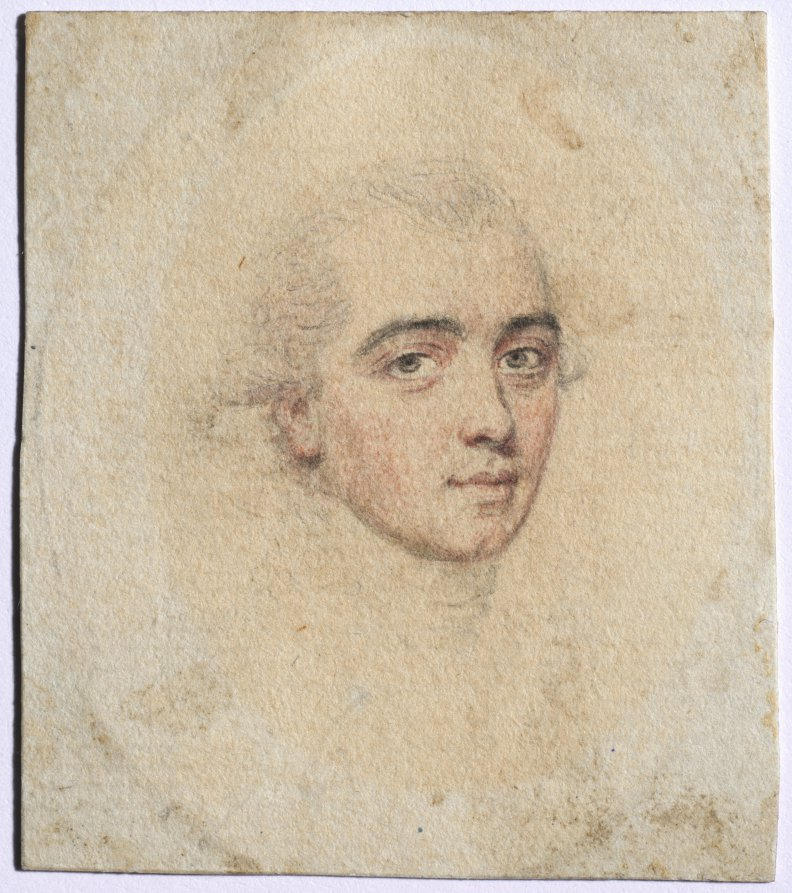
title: Portrait of M. de Viapre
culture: England, 18th century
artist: John I Smart (British, 1741–1811)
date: c. 1776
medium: graphite and wash on laid paper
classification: Portrait Miniature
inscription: Signature: none; inscribed on paper backing in graphite, upside down at upper left: 196; also on paper backing on slant at center, in graphite: Sir ?/John/Lester and 11; inscribed on back of drawing, under paper backing in graphite at bottom: Mr De [G?]iaf . . .; and in brown ink from top to bottom: Scarlet Coat . . . der Bottom [or possibly button]. . . green waistcoat . . . racelet & Spring [deli]vrd to Mr. Hall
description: Although it is impossible to say if it was always part of the artist’s process to execute a preparatory sketch prior to painting each miniature, we do know that John Smart retained many hundreds of these sketches. A group of preparatory sketches—of which this portrait is one—descended through the Smirke family after Smart’s daughter Sarah gave a sketchbook containing preparatory portrait studies to her friend Mary Smirke, sister of the celebrated Victorian architect Sydney Smirke. This book was probably broken up around 1877 when it was divided between Sydney’s daughters Mary Jemmett and Mrs. Lange, whose portions were both sold at auction in 1928. G. C. Williamson was the first to suggest that Smart’s sketches were well known and that they were preparatory studies for the painted miniatures. Williamson listed the names of sitters from the sketches known to him at the time, and they include Sir John Lester, the title formerly given to the sketch here. This designation was applied only to a paper backing that had been attached after the drawing had been removed from the sketchbook. There is no further evidence for this attribution, however. This sketch presents only the sitter’s head, with a slight suggestion of a high stock collar. His head faces to the left, and his light hair is combed straight back with a flat curl above the right ear. He has gray eyes, and the background is unpainted. The work can be dated to around 1776 because of its size, which, when painted on ivory, would have been around 2 inches high. An inscription on the back of the drawing was discovered when the paper backing was removed in 1993. It is a fragment of a larger inscription, from which it has been cut. It is partly illegible but suggests that the work was intended to be set in a bracelet, and it gives some information about how the sitter was to appear in the finished miniature, including the description “scarlet coat . . . green waistcoat.” This combination of colors might seem almost flashy, but it appears elsewhere in Smart’s work. These details seem to have been written in Smart’s hand, while the graphite inscription below—“Mr. De [?]”—was probably written later in another hand. Miniatures expert Arthur Jaffé remarked in 1948 that this portrait probably depicted John Lester of Poole, Dorset, who was knighted in 1802. However, this identity was based solely on the inscription on the later paper backing that Jaffé did not have the opportunity to see removed to reveal the inscription in Smart’s hand on the back of the drawing itself. There are no portraits of Sir John Lester known, and to this date, the finished ivory for which this preparatory sketch was presumably undertaken has not been discovered.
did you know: Sketches helped John Smart work out the particulars of a portrait before commencing the miniature on ivory; they were useful in the event that a duplicate might later be required.